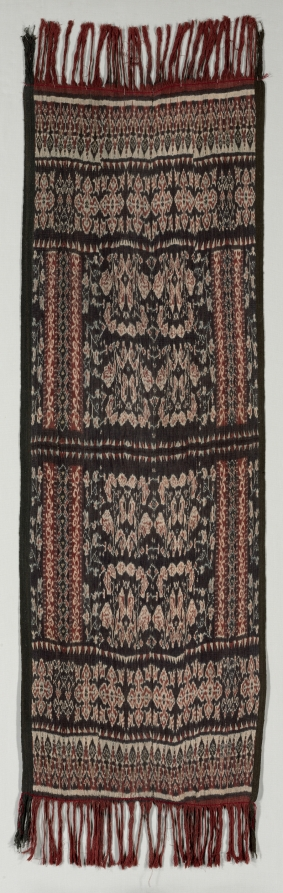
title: Man's Wearing Cloth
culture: Indonesia, Roti ?, late 19th - early 20th century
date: late 1800s - early 1900s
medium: tabby weave, warp ikat; cotton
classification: Textile